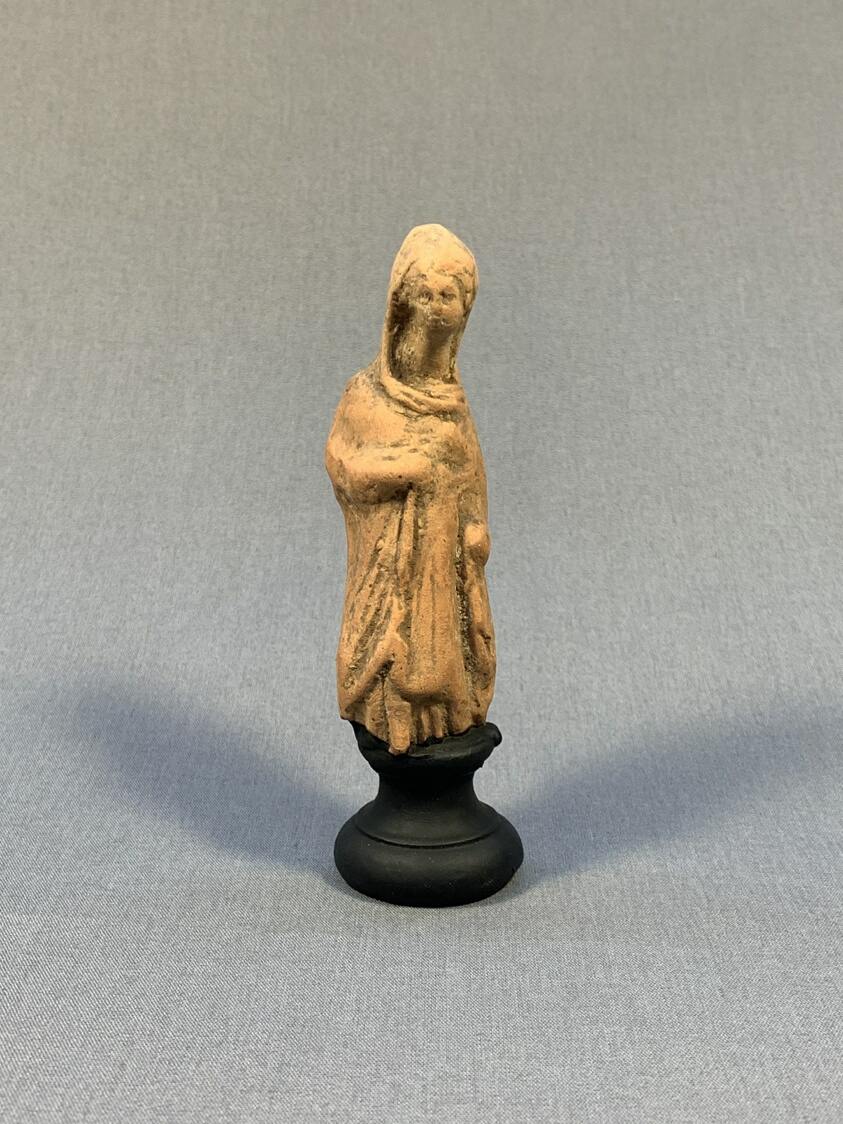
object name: Sculpture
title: Statuette of a Woman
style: greek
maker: Greek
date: 5th-4th century BCE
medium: terracotta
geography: Smyrna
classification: earthenware; ceramics; sculpture; ancient art